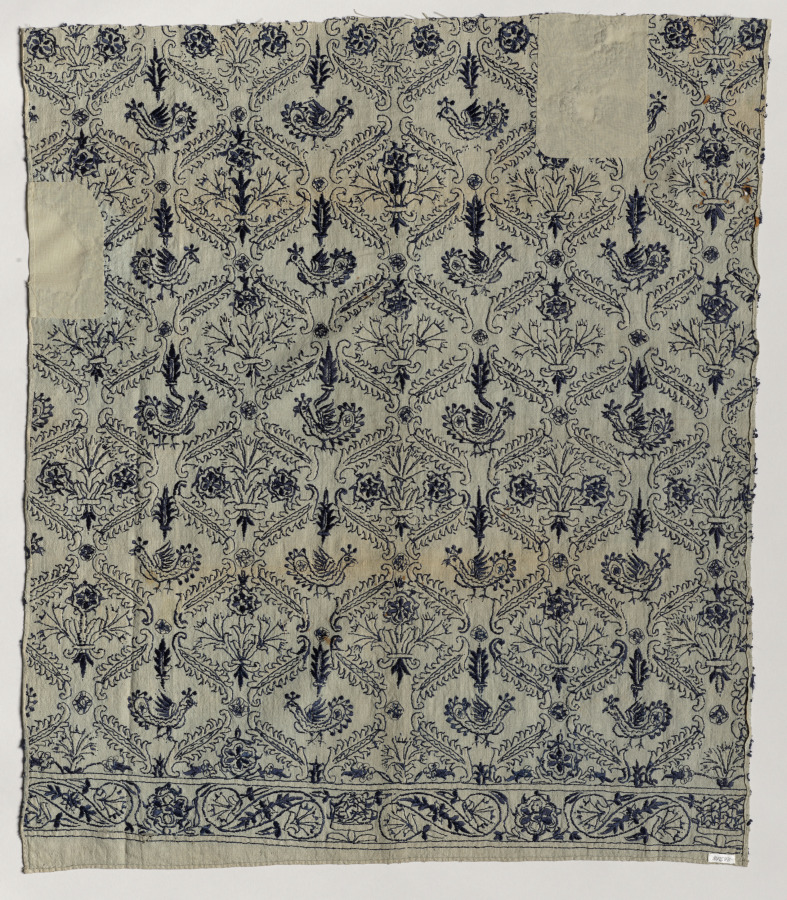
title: Fragment of a Bed Curtain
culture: Greece, Crete, 17th-18th century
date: 1600s - 1700s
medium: embroidery: silk on linen tabby ground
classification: Embroidery